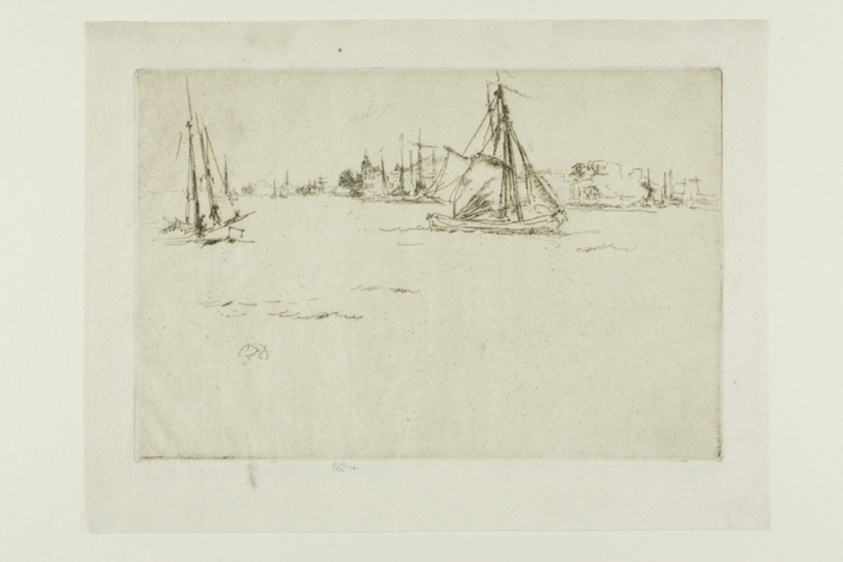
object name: Print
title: Dordrecht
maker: James McNeill Whistler (American, 1834-1903)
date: 1886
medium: Etching and drypoint with foul biting in dark brown ink on ivory laid paper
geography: United States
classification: etching; foul biting; print; prints and drawing; drypoint; paper